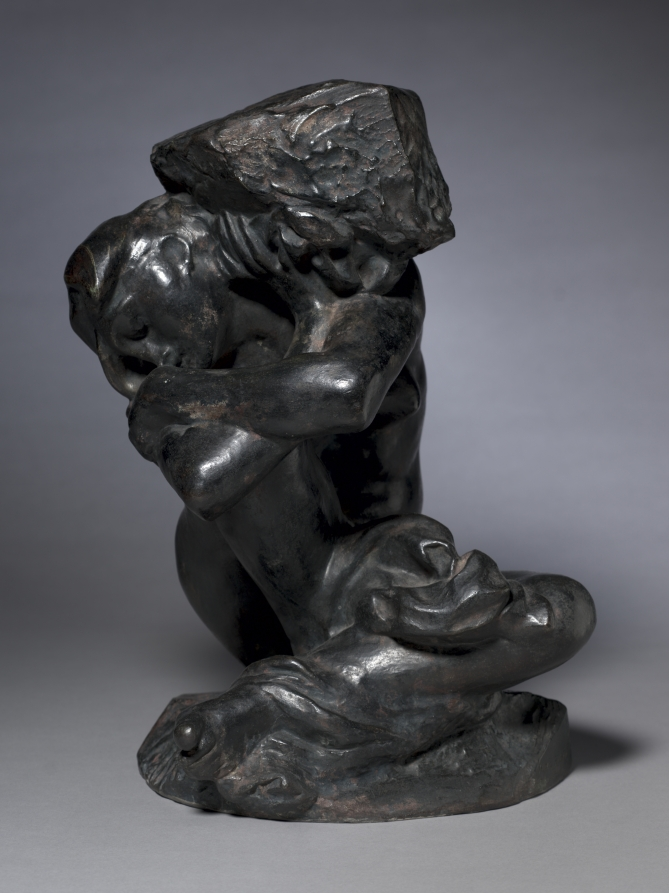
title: Fallen Caryatid Carrying Her Stone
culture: France, 19th century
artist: Auguste Rodin (French, 1840–1917)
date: 1880–81?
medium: bronze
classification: Sculpture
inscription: on base, right front: Alexis Rudier/Fondeur, Paris; left rear, on base: A. Rodin. Sticker on inside: P. Navez Exposition de Pittsburgh Caryatide Musée Rodin No. 764.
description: A caryatid is a column in classical Greek architecture carved to resemble a female figure. Rodin originally designed Fallen Caryatid Carrying Her Stone to serve as one of the figures on his monumental sculptural doorway The Gates of Hell. While Greek caryatids are typically draped, Rodin stripped the body of clothing and depicted the caryatid crushed under the weight of a stone, symbolically suggesting a state of physical suffering or emotional anguish. He exhibited Fallen Caryatid as an independent sculpture as early as 1883 and produced multiple versions in marble and bronze.